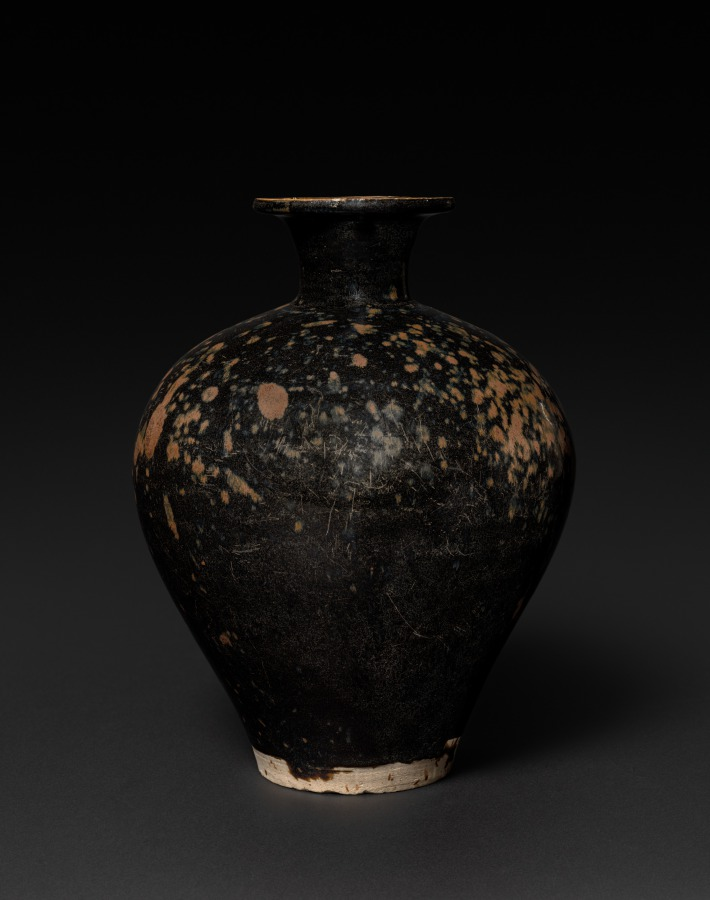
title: Vase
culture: China, Northern Song dynasty (960-1127)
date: 1000s–1100s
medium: glazed stoneware with underglaze iron decoration, Northern Black ware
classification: Ceramic